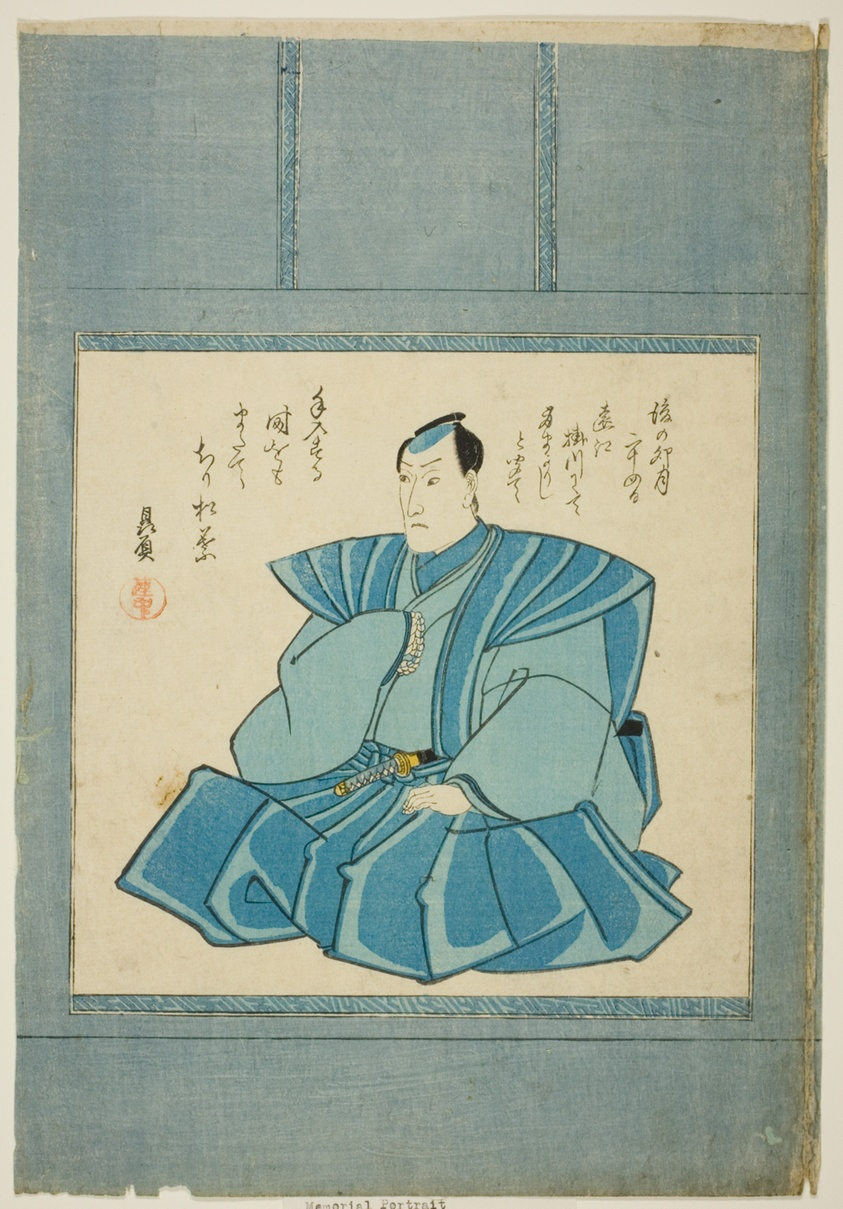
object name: Print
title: Memorial Portrait of the Actor Onoe Kikugoro III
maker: Attributed to Utagawa Kunisada I (Toyokuni III); Japanese, 1786-1864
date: 1849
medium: Color woodblock print; oban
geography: Japan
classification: print; asian art